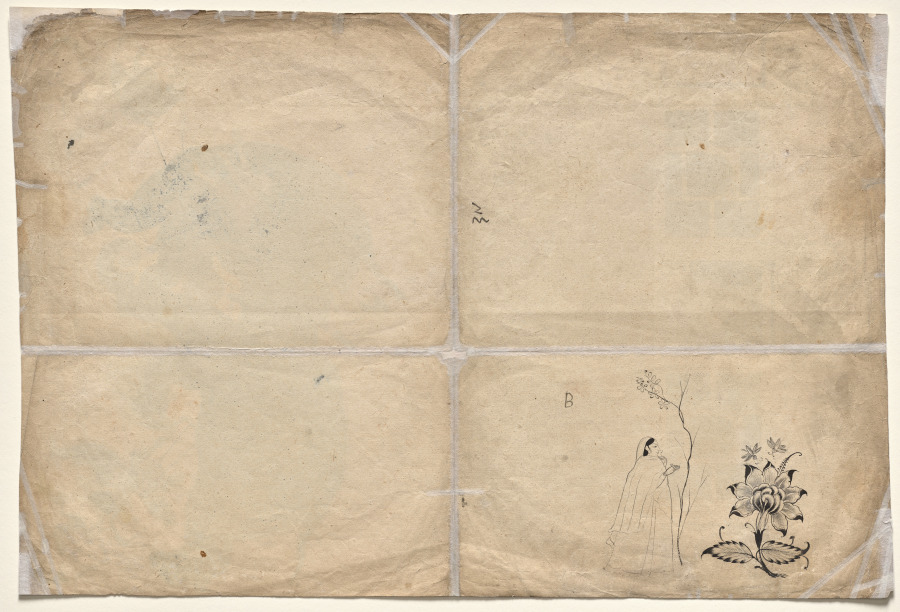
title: Two Elephants Fighting in a Courtyard Before Muhammad Shah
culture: India, Guler school, 18th century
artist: attributed to Nainsukh (Indian, 1710–1778)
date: c. 1730–40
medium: Gum tempera and ink on paper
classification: Painting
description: The Mughal emperor responsible for a revival of courtly arts and pastimes was Muhammad Shah (reigned 1719–48). This painting was made by an artist from a small kingdom in the western Himalayas who stayed at the Mughal court in Delhi and painted scenes of his experiences. Like his predecessors, Muhammad Shah enjoyed watching elephant fights. He is shown in his window of public audience, marked by a golden carpet, smoking a hookah. Women from his harem can be seen looking on from behind painted screens. Two pairs of men hold fire brands and spears to prevent the elephants from running off and to keep them under control. The intensity of the fight—captured at a moment when one mahout, or elephant trainer, has dropped his goad and is about to jump off—is augmented by the dense colors and forms in contrast to the otherwise pale planes, balanced only by the strip of palace windows.